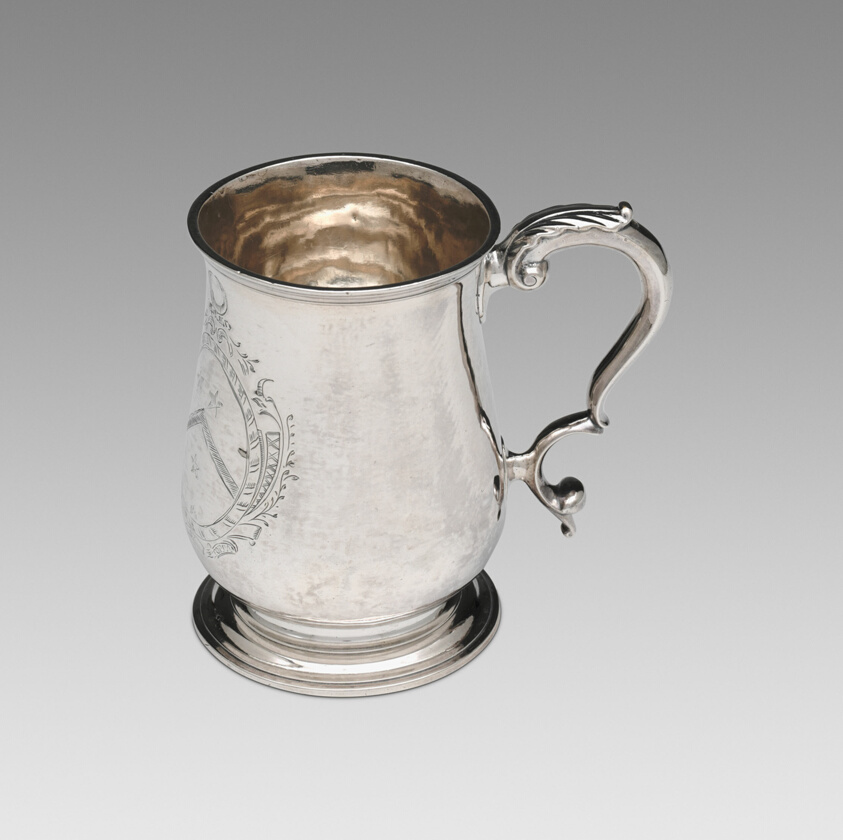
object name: Metalwork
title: Cann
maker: Benjamin Burt; American, 1729–1805; Boston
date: c. 1765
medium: Silver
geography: Boston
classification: drinking vessel; silver; american decorative arts; american arts; decorative arts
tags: dining, drinking